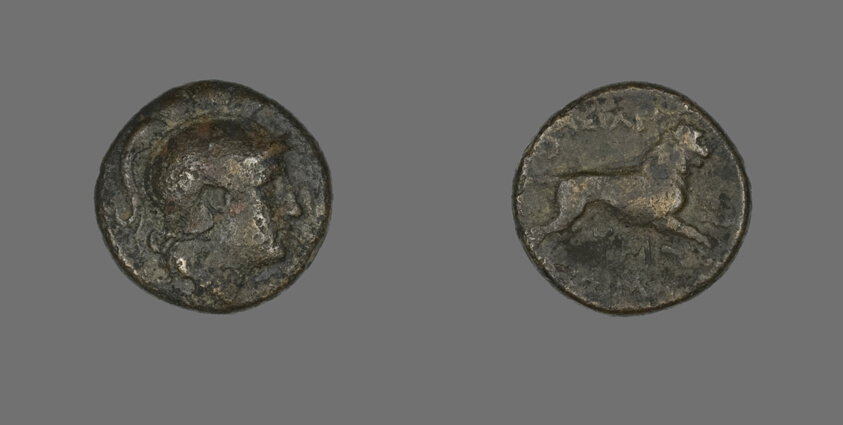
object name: Coin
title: Coin Depicting the God Ares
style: greek, ancient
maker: Greek; Thrace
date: 306-281 BCE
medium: Bronze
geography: Ancient Greece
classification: coin; ancient art